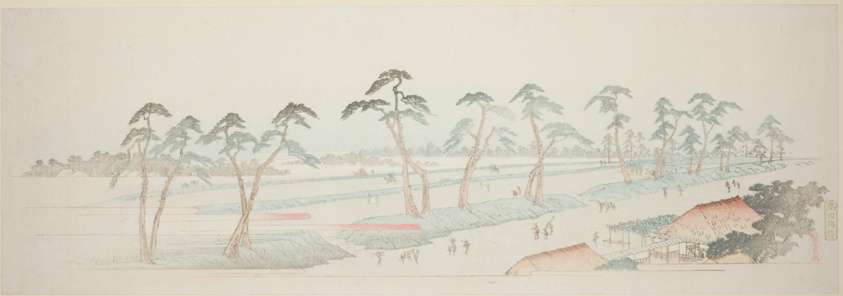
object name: Print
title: Takada Riding Grounds (Takada baba), from the series "Thirteen Views of the Environs of Edo"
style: Japanese (culture or style)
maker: Utagawa Hiroshige 歌川 広重; Japanese, 1797-1858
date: c. 1837/44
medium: Color woodblock print; ebangire, surimono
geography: Japan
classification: woodblock print; print; asian art